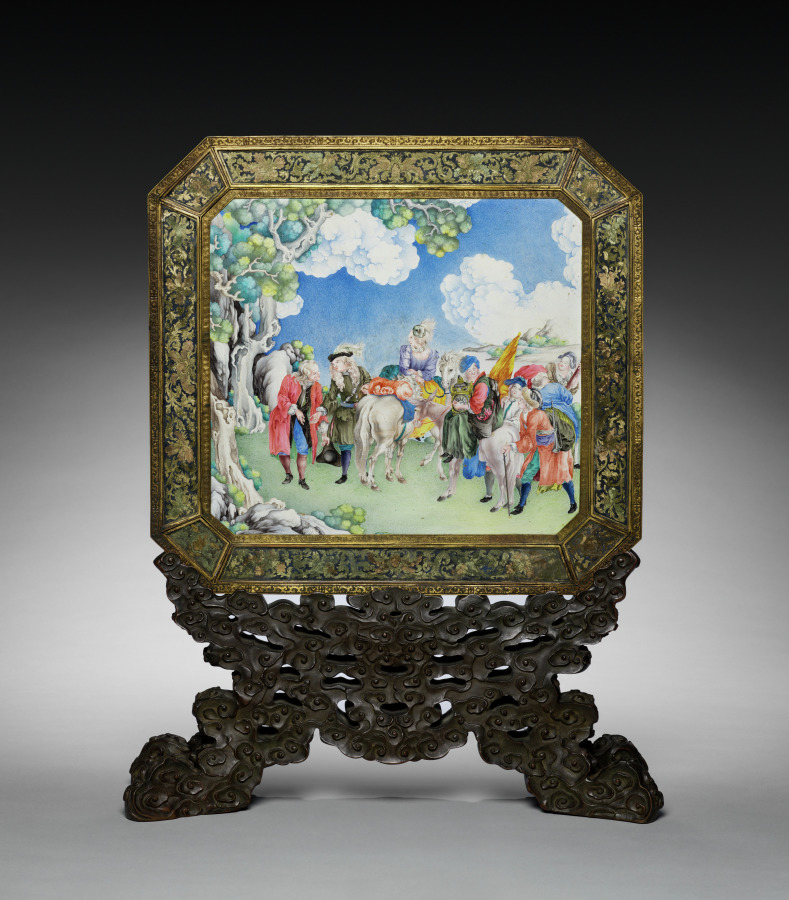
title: Screen with European Figures (obverse) and Landscape (reverse) with Stand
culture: China, Beijing palace workshops, Qing Dynasty (1644-1911), Qianlong reign (1736-1795)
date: 1736–95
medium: painted enamel, glass painting, and cast-iron stand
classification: Enamel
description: On the obverse side of this two-sided table screen is an enamel-painted copper plaque with European figures. The image is probably derived from prints. European enamelware was introduced to China through missionary-artists at the Beijing court and foreign trade in Guangzhou. On the reverse side is a glass painting of architectural landscape in the Chinese style. At the Qing court, imperial commands made possible artistic collaboration and the incorporation of different artistic expressions in a single artwork.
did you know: The screen is balanced on a heavy cast-iron base.